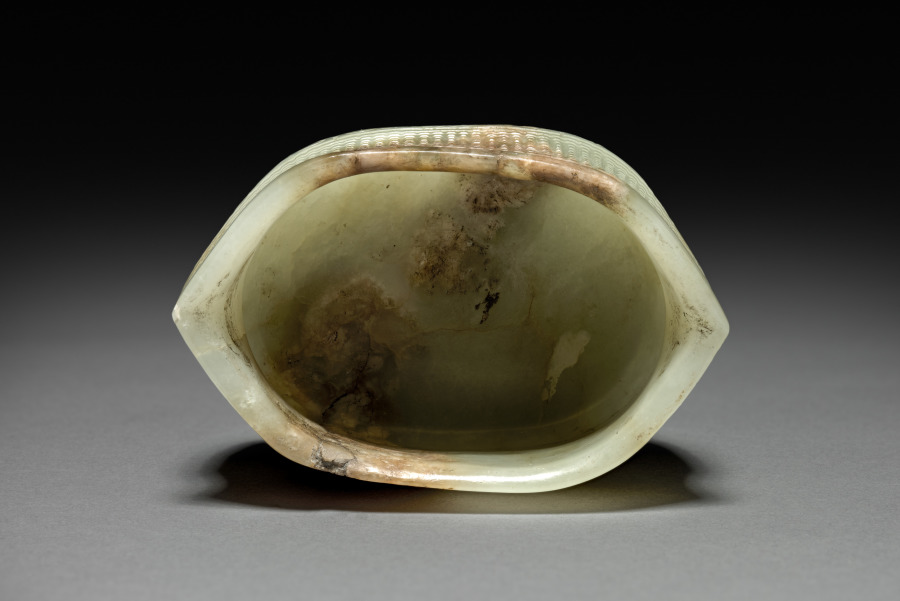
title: Cup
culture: China, Song dynasty (960-1279)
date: 960– 1279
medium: jade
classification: Jade